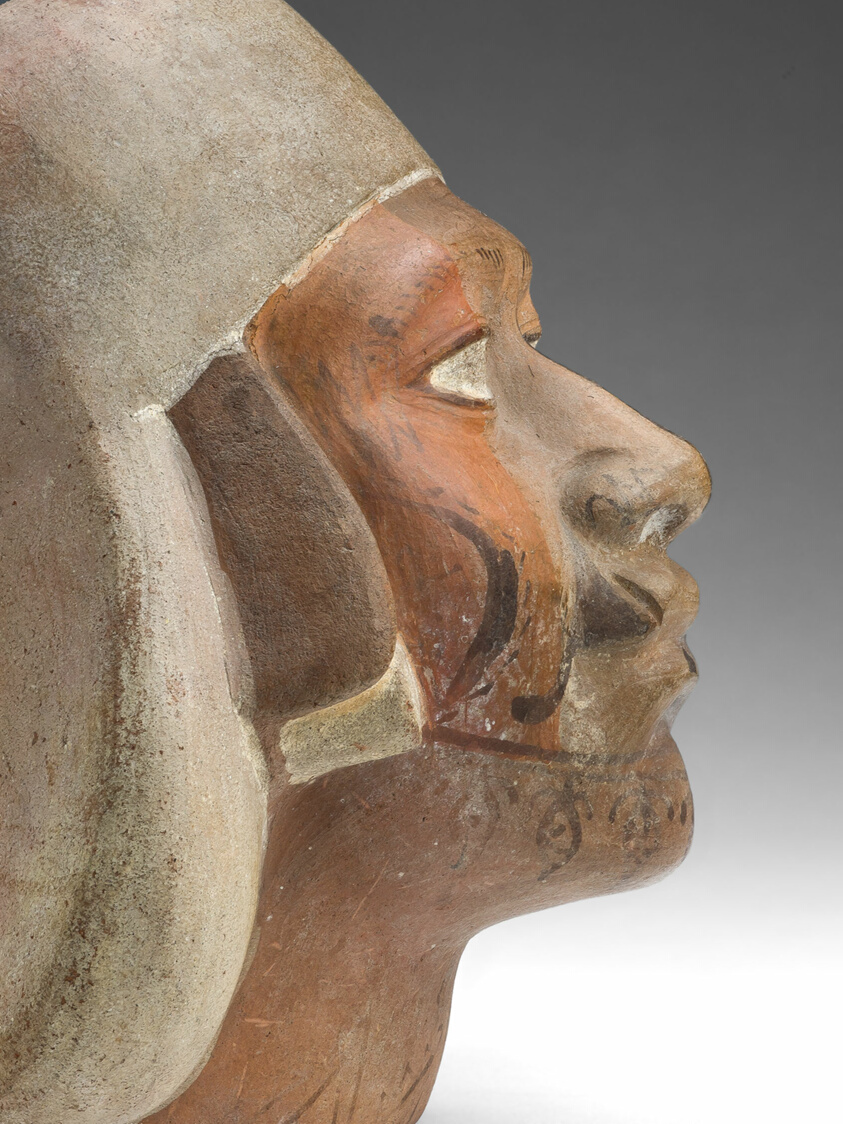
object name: Vessel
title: Portrait Vessel of a Young Man with a Scarred Lip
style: moche, mochica, early intermediate period, Pre-Columbian, americas, andes, Arts of the Americas, andean, south american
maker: Moche (North coast, Peru)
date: 100 BCE–500 CE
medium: Ceramic and pigment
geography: Peru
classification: art of the americas; vessel; ceramics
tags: people, portraits